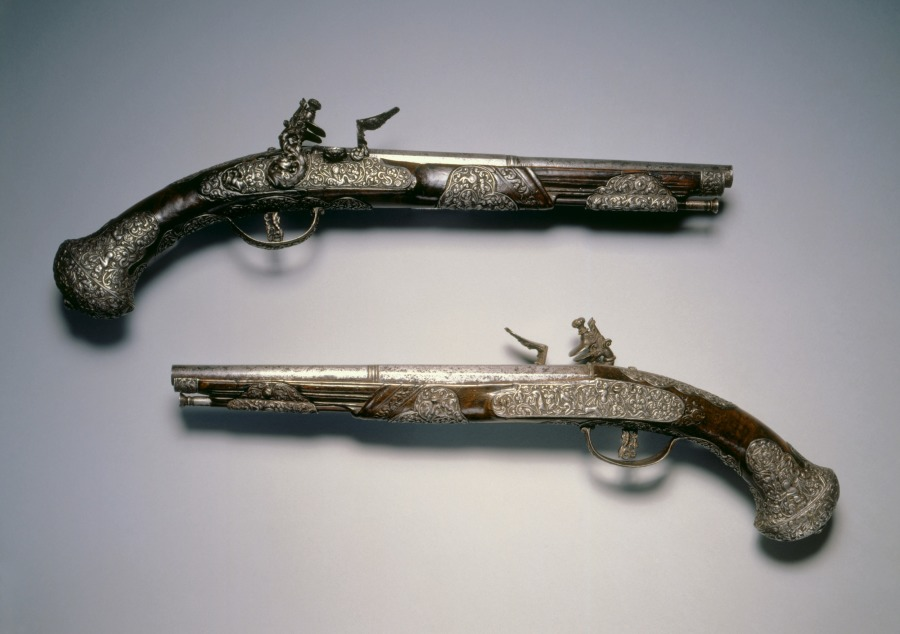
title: Pair of Flintlock Pistols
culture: Italy, Brescia, 17th century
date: c. 1670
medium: steel, chiseled decoration with walnut stock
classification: Arms and Armor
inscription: P. Moretta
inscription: CARLO LERME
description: The chiseling of gun ornament is a task comparable to sculpture on a miniature scale, carried out in an extremely hard material. Since this was usually beyond the skill of most gunsmiths, it was not uncommon for such work to be contracted out as occurred here. While the barrels are signed P. Moretta, the lock plates of these pistols are signed Carlo Lerme, who also chiseled the mounts.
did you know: This type of pistol fired only once before needing to be reloaded, so they were often produced in matched pairs. Even the trigger is decorated on these beautifully ornate weapons. Look closely to compare how a skilled craftsman carefully matched the patterning on these two guns.